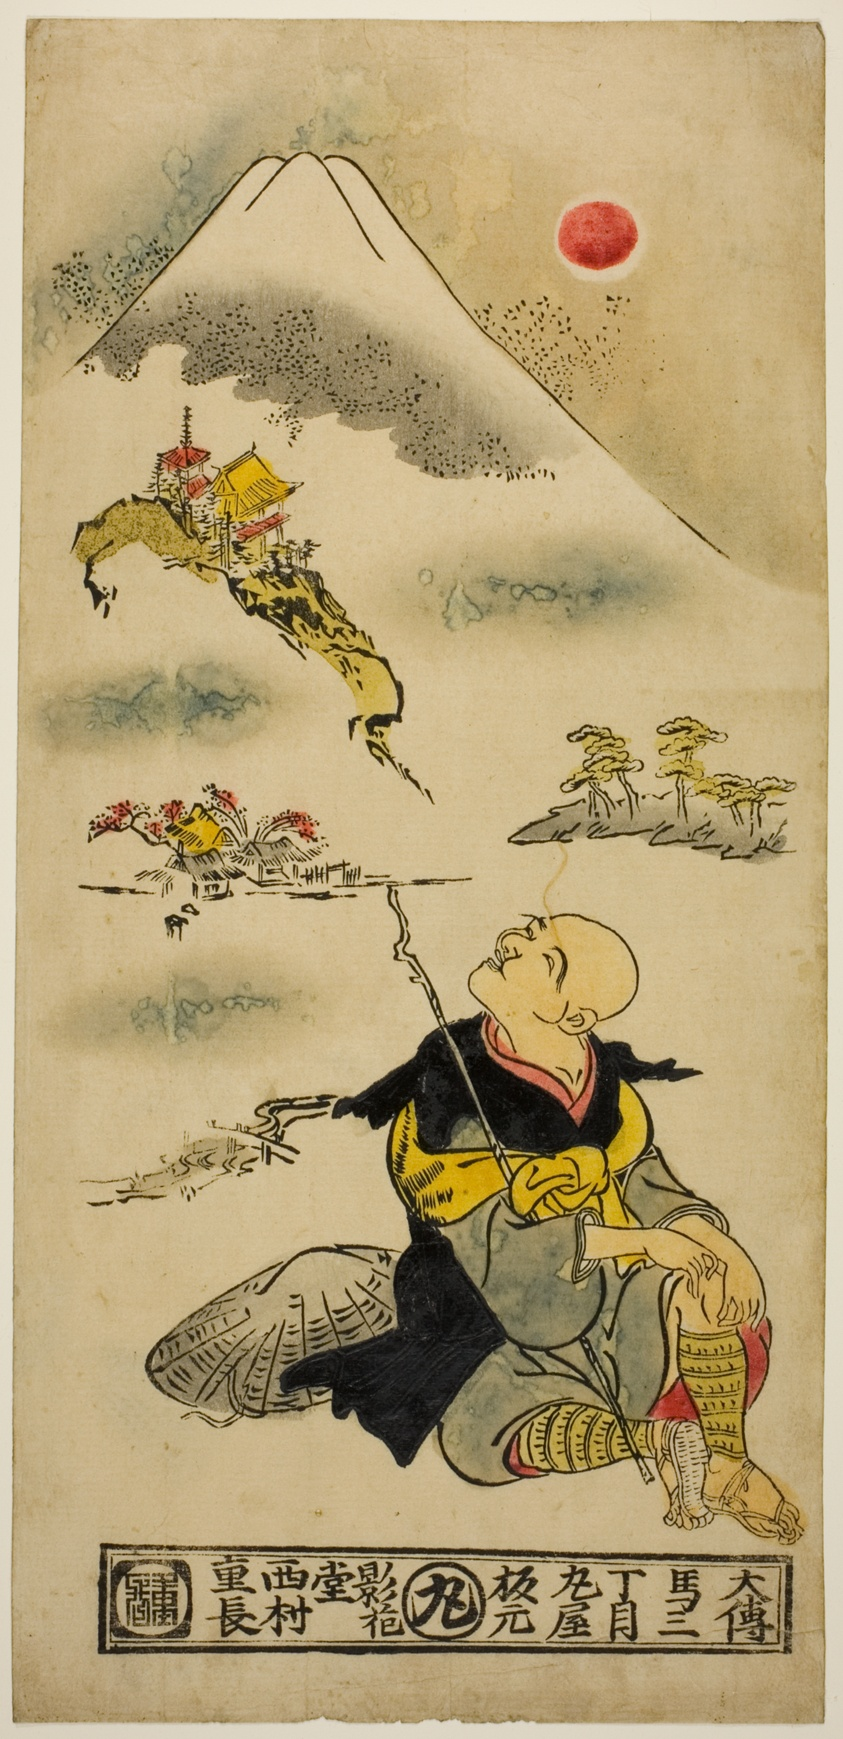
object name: Print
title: Saigyo Hoshi gazing at Mt. Fuji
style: Japanese (culture or style)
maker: Nishimura Shigenaga (Japanese, 1697 (?)-1756)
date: c. 1730s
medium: Hand-colored woodblock print; hosoban, urushi-e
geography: Japan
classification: print; asian art